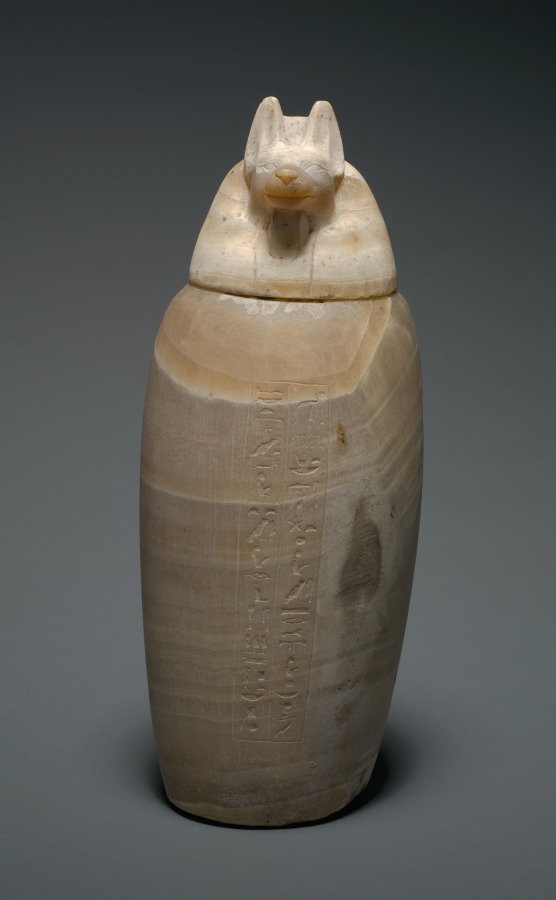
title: Canopic Jar with Jackal's Head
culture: Egypt, Late period (715–332 BCE), Dynasty 26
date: 664–525 BCE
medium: travertine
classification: Funerary Equipment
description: In the process of mummification, the liver, lungs, stomach, and intestines were removed, separately embalmed, and stored in specialized jars known as canopic jars (after a sailor in Greek mythology, who died at the town of Canopus in the Nile Delta and was worshipped there in the form of a human-headed jar). Each organ was identified with one of four funerary deities collectively known as the Sons of Horus: the liver with Imsety (man's head), the lungs with Hapy (baboon's head), the stomach with Duamutef (jackal's head), and the intestines with Qebehsenuef (falcon's head). It was their duty to protect the deceased and restore to him his body parts in the hereafter.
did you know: This jar is made of travertine stone-- subtle in color and with a captivating natural pattern-- with hieroglyphics carved on the front. Such jars were used to hold internal organs of the deceased and to preserve them for the afterlife.